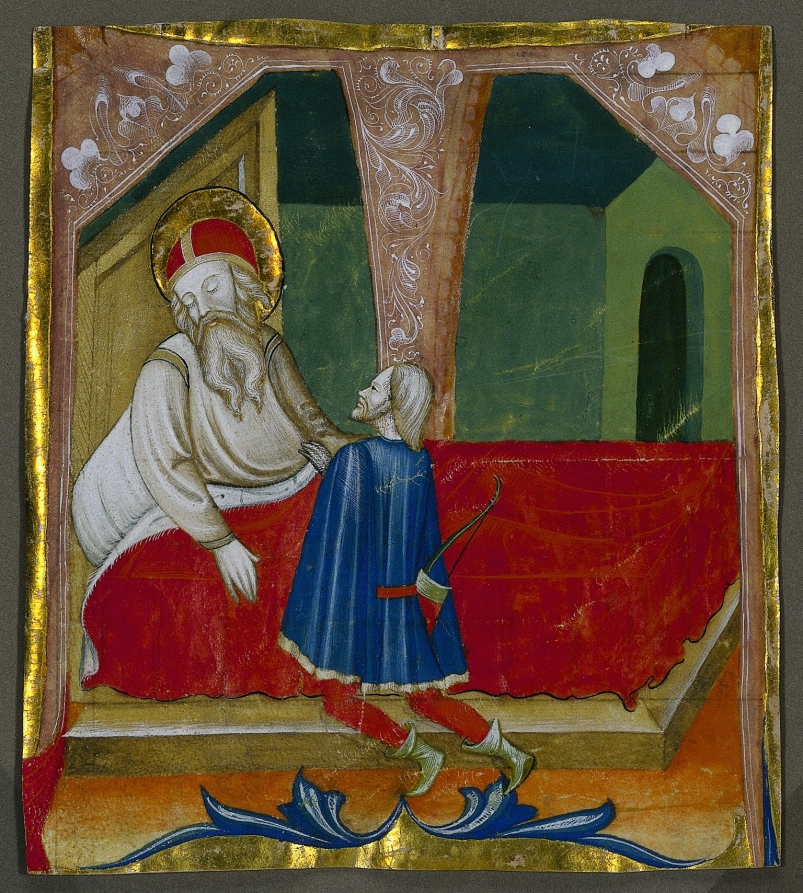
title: Initial T from a Choral Book with Isaac and Esau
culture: Italy, Lombardy, 15th century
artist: Bartolomeo da Gallarate (Italian)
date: c. 1460–70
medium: ink, tempera, and gold on parchment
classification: Manuscript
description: The subject of this initial recounts the biblical story of the "stolen" blessing of Esau. The dying Isaac, old and blind, is approached by his son Esau, who seeks his blessing. Esau discovers that his twin brother, Jacob, had already obtained the irrevocable blessing through deception.